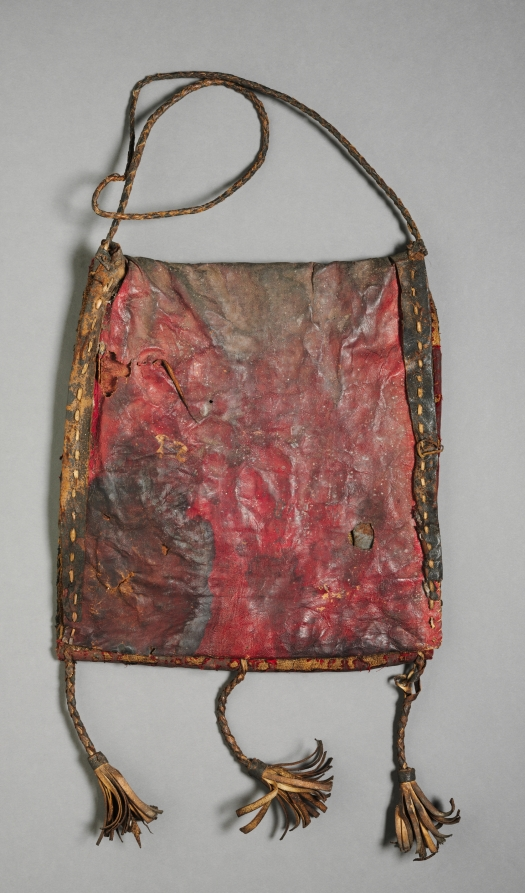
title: Diviner's Bag (Apo Ifa)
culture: Africa, West Africa, Nigeria, Yorùbá-style maker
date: 1900s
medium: Leather, glass beads, and natural fiber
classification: Textile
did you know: While used in the western part of Africa, the beads on this bag were imported from Europe.